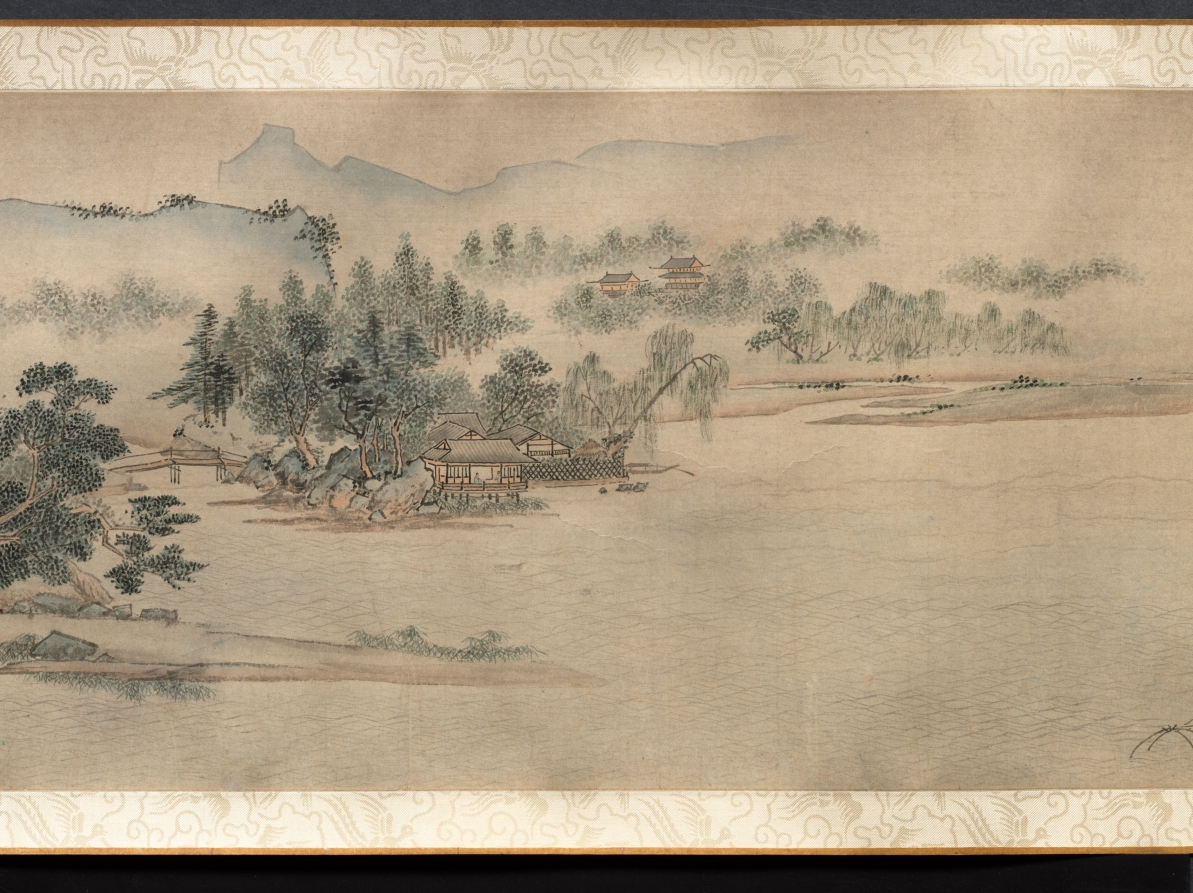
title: Ten Thousand Li of the Yangzi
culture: China, Ming dynasty (1368–1644)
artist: Dai Jin (Chinese, 1388–1462)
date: c. 1400s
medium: Handscroll; ink and color on paper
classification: Painting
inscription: Two colophons at end. Artist's seals: Dai Jin 戴進 and Wenjin 文進.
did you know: Dai Jin is traditionally considered the founder of the Zhe School, a style of landscape painting.